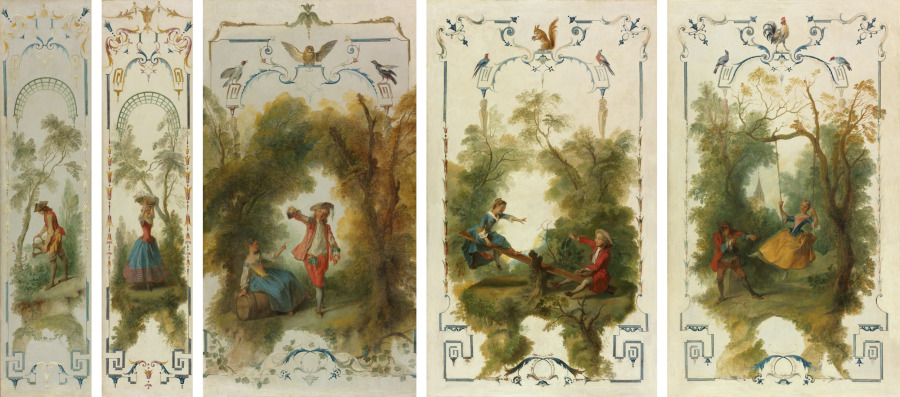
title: Wall Panels: The Gardener, Horticulture, The Vineyard, The See-Saw, The Swing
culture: France, 18th century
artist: Nicolas Lancret (French, 1690–1743)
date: c. 1723–27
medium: oil on canvas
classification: Painting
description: This whimsical series is one typically found in fashionable, elite Parisian residences of the eighteenth century. Panel paintings of this variety were created to decorate the space above chair rails and in between doors and windows, and Lancret's series was painted for a room in the Pavillon d'Hauteville in Paris. In keeping with the eighteenth-century French tradition of depicting the four seasons or the times of the day, Lancret's five decorative panels have a unifying theme. Pastoral activities and games, favored themes of Lancret, are the overarching motifs, and depict afternoon pastimes, set in nature. Three of the panels, the Swing, the See Saw, and the Vineyard, depict lithe, youthful duets playfully engaging in the outdoor pleasures, while the narrower panels, the Gardener and Horticulture, host individual figures cultivating lush, private gardens. Despite the disparate subjects, stylistic details unify the series, including the delicate arabesques derived from nature that frame the scenes, and similar flora and fauna in each panel.